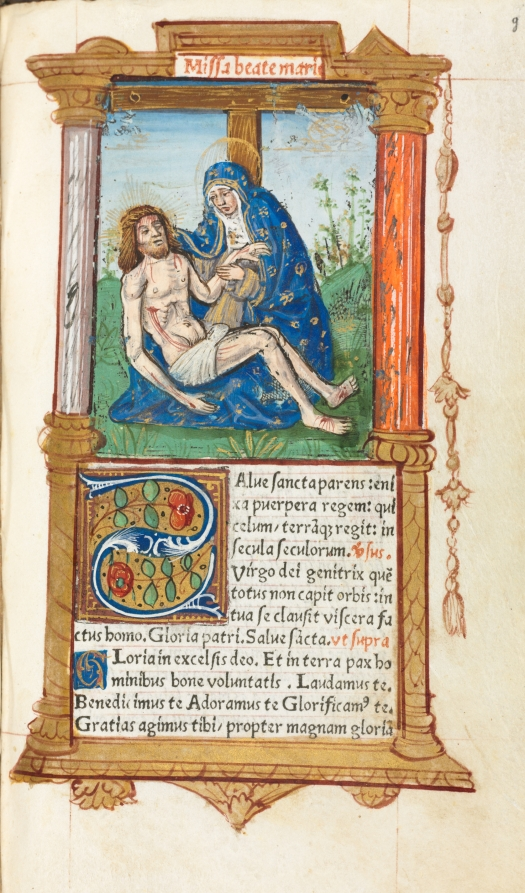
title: Printed Book of Hours (Use of Rome): fol. 53r, Pieta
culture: France, Paris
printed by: Guillaume Le Rouge (French, Paris, active 1493–1517)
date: 1510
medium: 112 Printed folios on parchment, bound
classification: Bound Volume